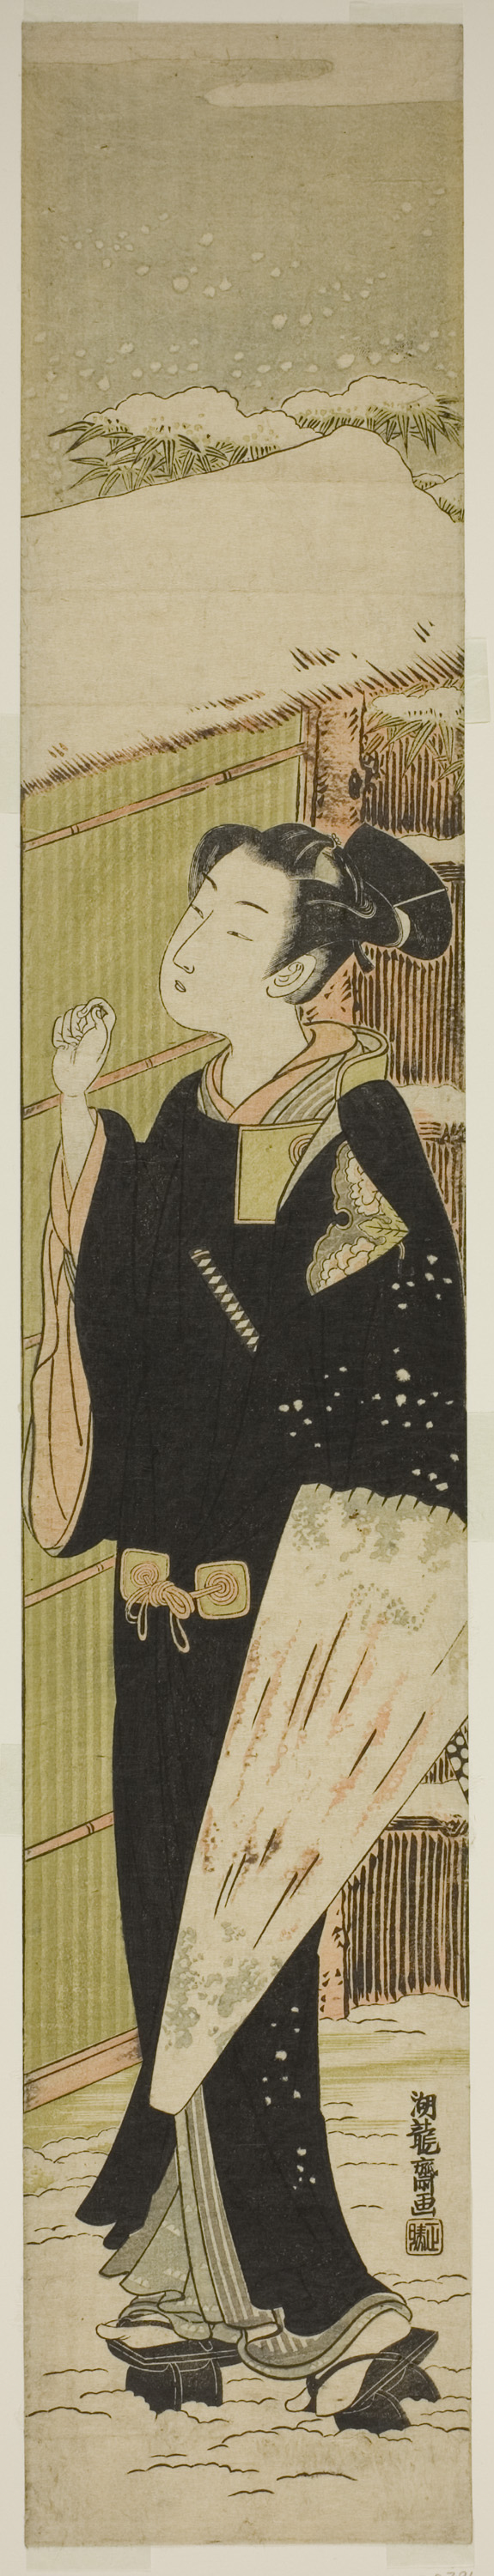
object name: Print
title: Young Man with Umbrella Knocking on Gate in Snow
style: Japanese (culture or style)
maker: Isoda Koryusai (Japanese, 1735-1790)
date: c. 1774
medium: Color woodblock print; hashira-e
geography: Japan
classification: woodblock print; print; asian art